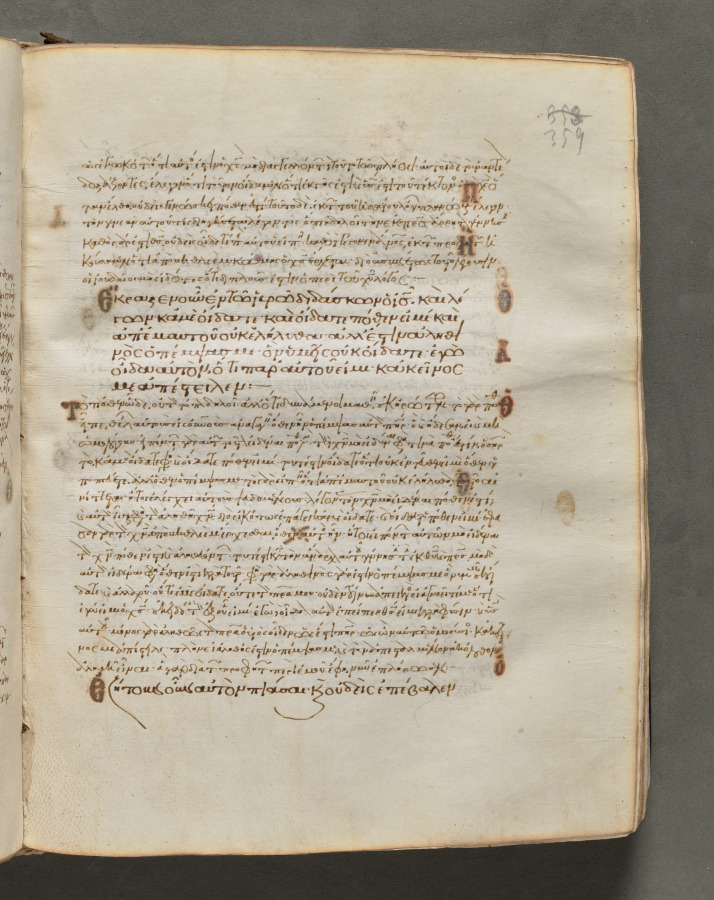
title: Text, folio 359 (recto), from a Gospel Book with Commentaries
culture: Byzantium, Constantinople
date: c. 1000–1100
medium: ink, tempera, and gold on vellum; leather binding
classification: Bound Volume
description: Each of the four gospels in this book opens on a page with brilliantly illuminated borders depicting the author of the text as well as birds—principally peacocks, symbols of the immortality of the soul—and fountains, representing the fountain of life and the salvation of the soul. This volume consists of 428 leaves with texts in Greek. Its level of sophistication suggests that it was probably written and decorated in a monastery in Constantinople.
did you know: Gospel books were carried in procession through Byzantine churches.